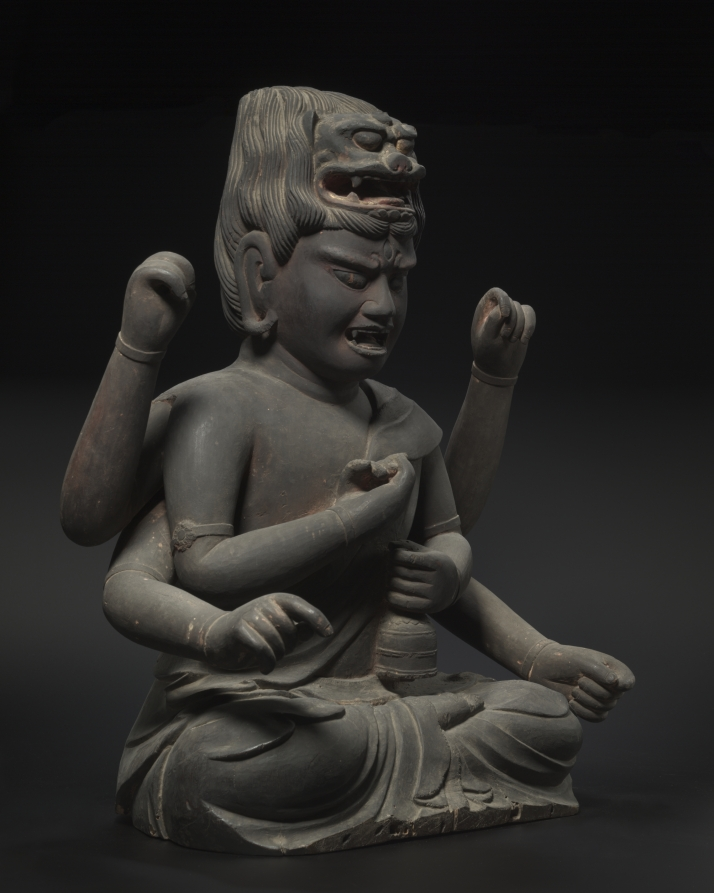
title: Aizen Myōō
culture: Japan, Kamakura period (1185–1333)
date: early 1300s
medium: Wood with black lacquer and red pigments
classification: Sculpture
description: The Buddhist deity Aizen Myōō channels carnal desire into a lust for spiritual enlightenment. In its principal right arm, this figure once held a vajra, a symbolic weapon used to cut through illusion, while its main left arm still grasps the vajra bell rung to bring one to awareness. The lion’s head in Aizen’s hair holds its mouth open to devour thoughts and desires. Holes along the front of the legs show where the sculpture’s base would have been attached.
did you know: The torso, head, and legs of this figure were carved from a single block of wood. Four of the arms were carved separately.